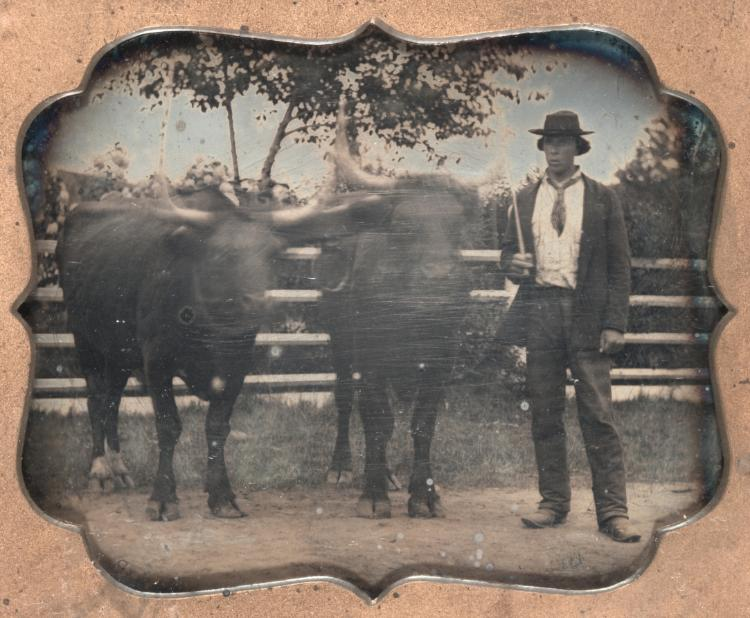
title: Two Oxen and Driver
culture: America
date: 1850s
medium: daguerreotype, sixth plate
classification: Photograph